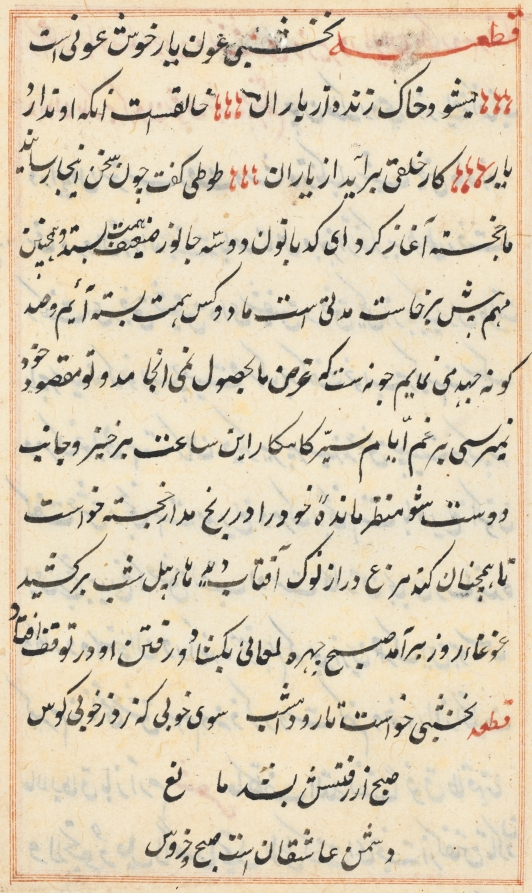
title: Page from Tales of a Parrot (Tuti-nama): text page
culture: Mughal India, court of Akbar (reigned 1556–1605)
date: c. 1560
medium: gum tempera, ink, and gold on paper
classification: Painting